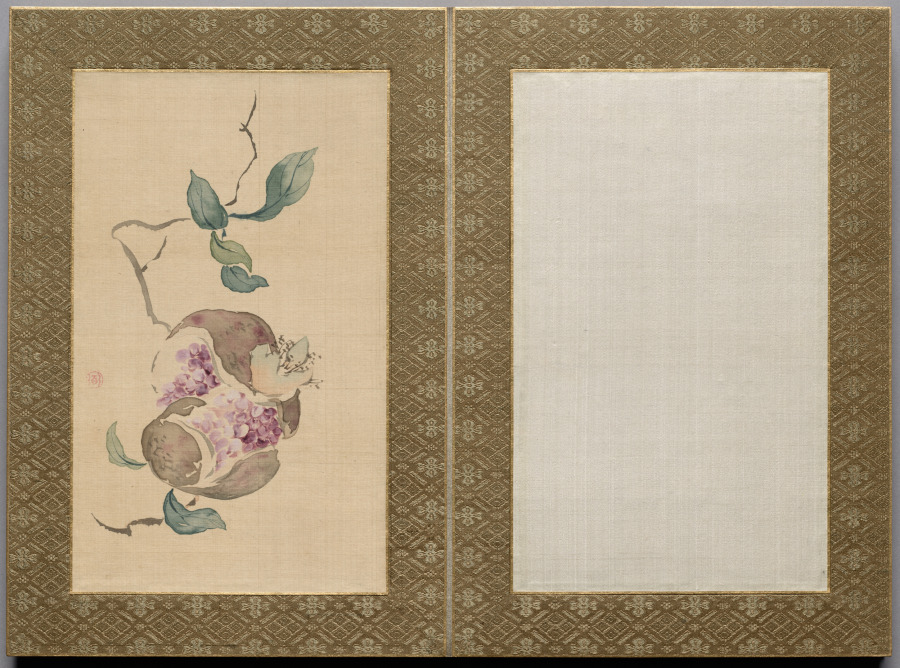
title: Painting from Flowers and Grasses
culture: Japan, Edo period (1615–1868)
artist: Tsubaki Chinzan (Japanese, 1801–1854)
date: 1841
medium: album; ink and color on silk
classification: Painting